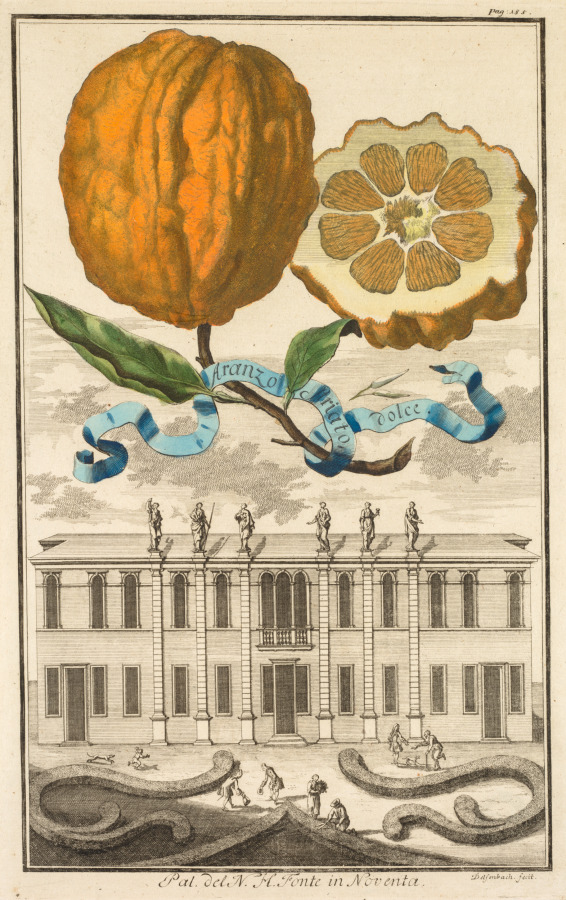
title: Nurnbergische Hesperides: No. 185 - Aranzo Striato dolce. Palazzo del N. H. Fonte in Noventa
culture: Hungary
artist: Joseph de Montalegre (Hungarian)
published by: Johoann Christoph Volckamer (German)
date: c. 1708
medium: engraving, hand-colored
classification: Print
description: The title of this set refers to Hercules, a mythological figure who must complete a series of difficult tasks. One of these was procuring the golden apples of the Hesperides, the nymphs who guarded this precious fruit. Hesperides also refers to books on citrus fruit, as it was once thought that the golden apples were actually Spanish oranges.